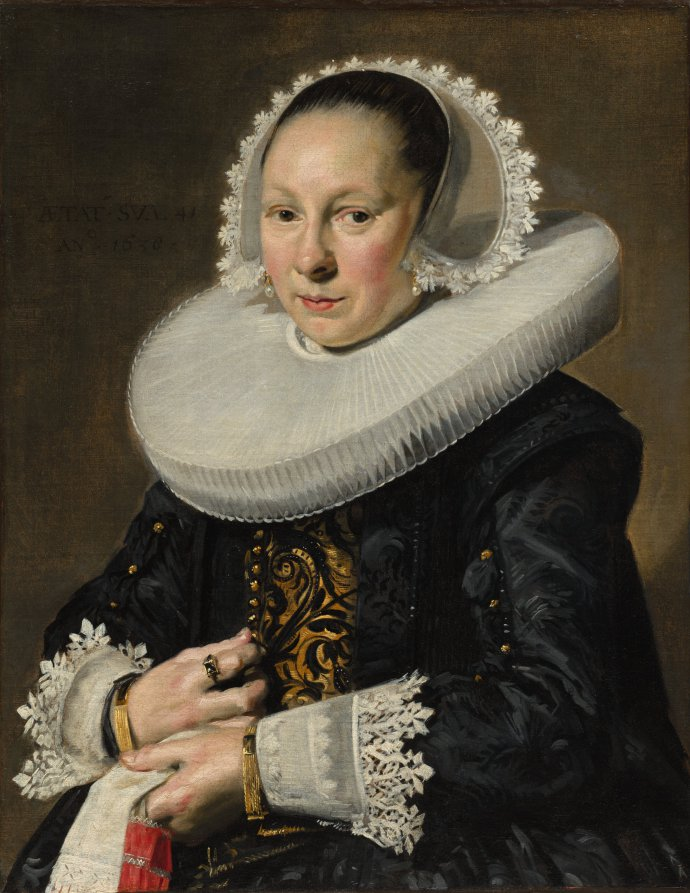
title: Portrait of a Woman, probably Aeltje Dircksdr. Pater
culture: Netherlands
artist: Frans Hals (Dutch, c. 1581–1666)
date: 1638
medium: oil on canvas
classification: Painting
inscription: Inscribed upper left: "AETAT SUAE 41 / ANNO 1638"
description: Portraits by Hals often feature bold, jagged brushstrokes. This portrait shows him experimenting with the “wet-into-wet,” technique, in which layers of paint were added in succession without being allowed to dry in between. Note the blended strokes used at the woman’s hairline to suggest individual strands of hair. The sitter has been tentatively identified as Aeltje Dircksdr. Pater (1597–1678), wife of the Haarlem brewer and burgomaster (mayor) Jan de Wael (1594–1663). An inscription states she was 41 when Hals painted her.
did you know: Jewelry, lace, and sumptuous fabrics show off this woman's wealth—and the artist's skill in painting them.